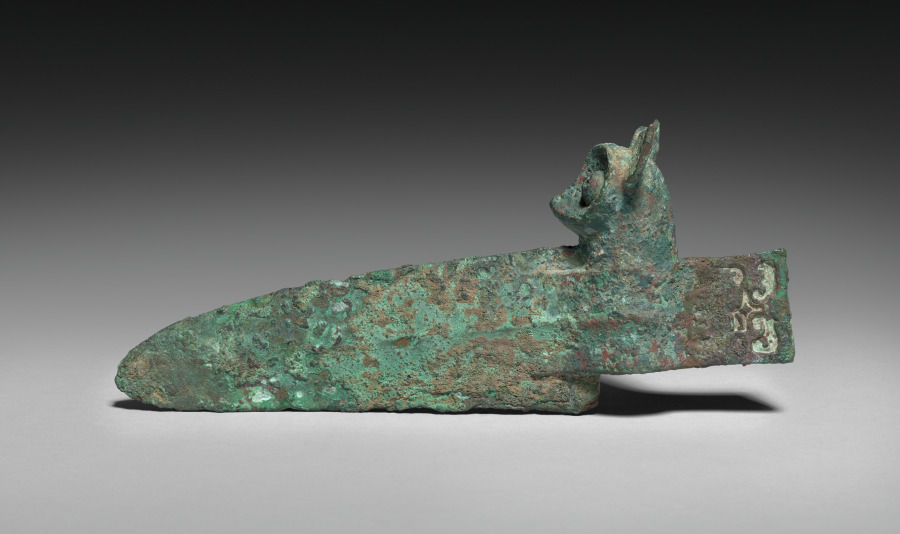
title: Axe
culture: China, Shang dynasty (c. 1600–c. 1046 BCE)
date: 1766–1045 BCE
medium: bronze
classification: Metalwork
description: The head of an owl with large eyes and ears, sitting above the blade of a halberd-axe, may have deterred evil and harm from its carrier. Whether such an axe was used in ritual or warfare is not clear.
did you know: A staff or pike would have attached to the blade via the socket below the owl's head.